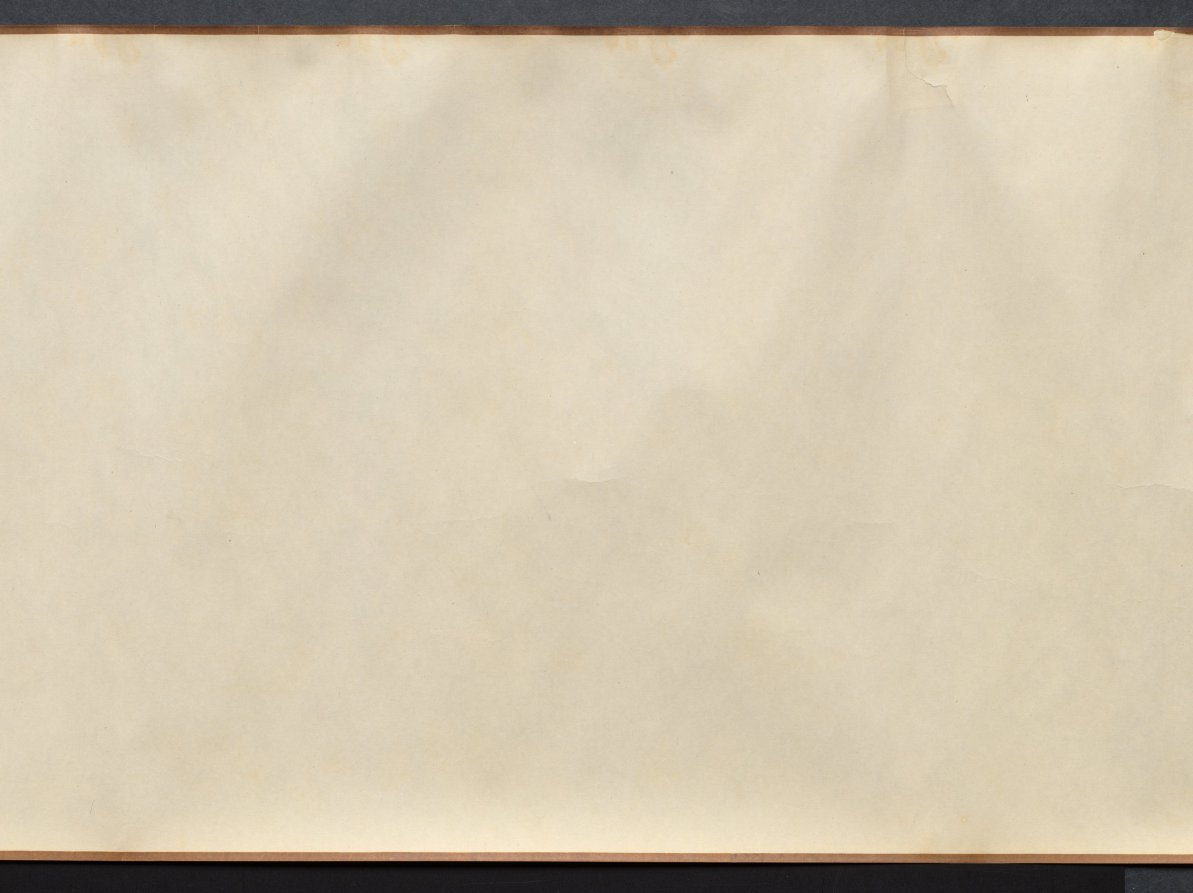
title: Returning to the Village in a Rainstorm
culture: China, Ming dynasty (1368–1644)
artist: Xie Shichen (Chinese, 1487–after 1567)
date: 1530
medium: Handscroll; ink and light color on silk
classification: Painting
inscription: 風雨歸村圖 嘉靖庚寅秋日樗仙謝時臣. [印] 謝時臣印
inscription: 3 additional seals unidentified.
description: This scroll depicts a wind- and rainswept landscape with figures in the countryside struggling against a late summer monsoon rainstorm. Such weather was familiar to residents of the lower Yangzi delta. Xie Shichen spent most of his life in the Suzhou area. Details of his career are scant, but his surviving works suggest that he made his living as a professional painter. This painting conveys drama and anecdotal observations, characteristic of Zhe school paintings, such as the one by Lü Wenying, CMA 1970.76.